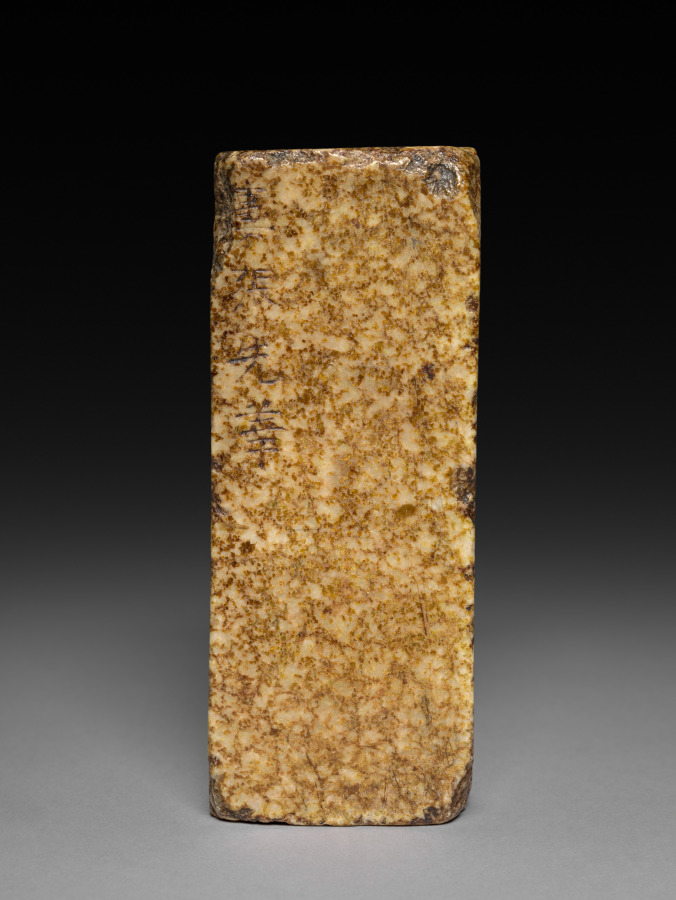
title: Sakyamuni Preaching: A Votive Stele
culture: China, Northern Dynasties period (386–581 CE), Northern Zhou (557-581)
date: c. 565 BCE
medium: Serpentinite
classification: Sculpture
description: The stele shows the historic Buddha Sakyamuni preaching, his lotus throne being flanked by lions, two attendants, and two disciples. There is a date and inscriptions on both sides of the stone.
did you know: Originally the figures and background were painted; traces of red and black remain. The figures’ clothing and some exposed skin were gilded.